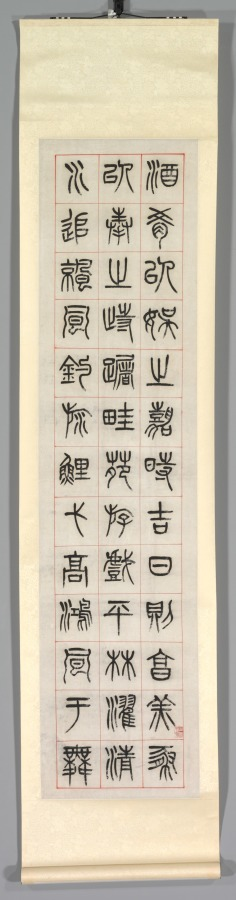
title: On Happiness, Calligraphy in Seal Script Style (zhuanshu)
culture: China, Changsu, Qing dynasty (1644-1911)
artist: Yang Yisun (Chinese, 1813–1881)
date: 1871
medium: hanging scoll, ink on paper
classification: Painting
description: Yang Yisun transcribed this ancient text on six narrow scrolls, starting at the top right and ending at the bottom left. Yang emphasizes the text’s historic nature by using the seal script style found on stone steles and bronze vessels. On Happiness features reflections of a scholar on a leisurely life in the countryside, composed by Han dynasty official Zhongchang Tong, who died the year the Han dynasty collapsed (AD 220). The idyllic life described in the text may bean evocation of the past in a time of national crisis. A decade before Yang wrote these scrolls, Anglo-French forces had looted and burned the Summer Palace in Beijing. At the same time, the domestic Taiping rebellion (1850–64), led by a religious fanatic to overthrow the Qing government, had devastated Yang’s homeland, the Jiangnan region, with an estimated 20 million lives lost.